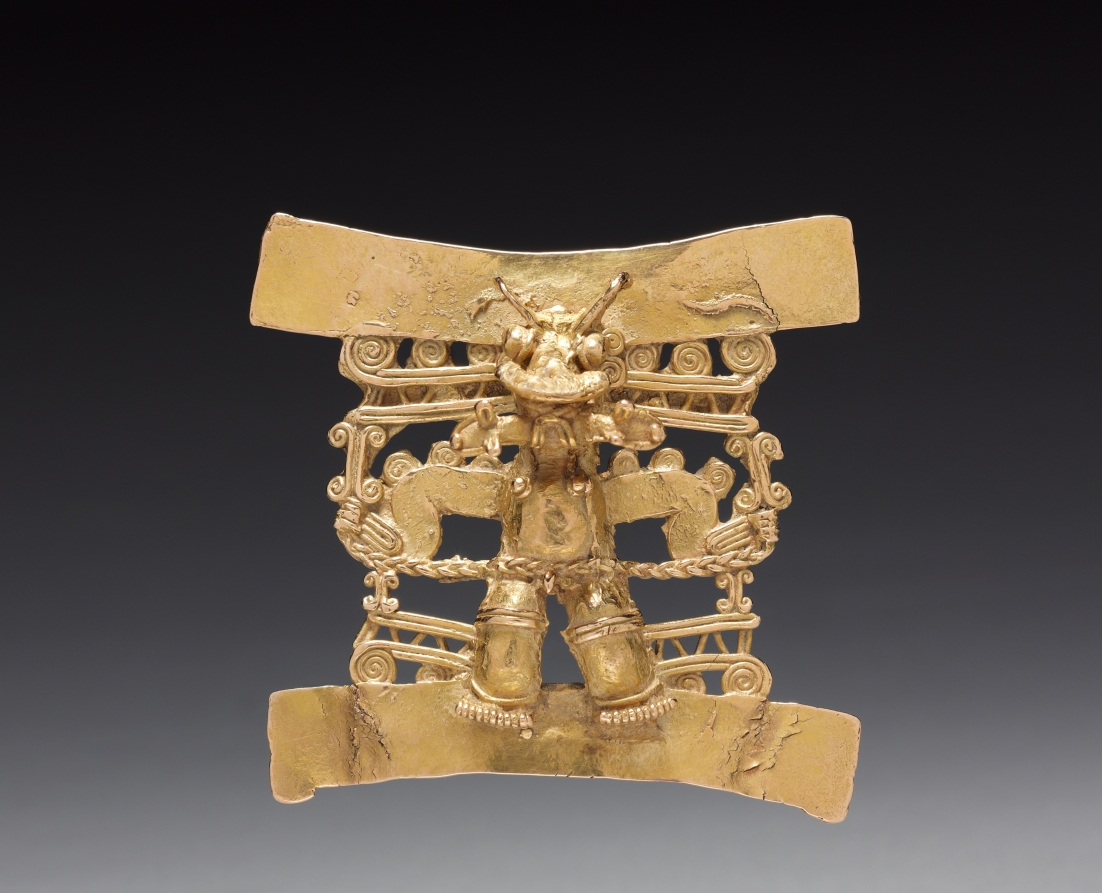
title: Animal-Headed Figure Pendant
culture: Costa Rica, Diquís region, 11th-16th century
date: c. 1000–1550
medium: cast gold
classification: Metalwork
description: Among the pendants shown here are a crustacean (1943.290), an animal-headed figure (1948.18), and two pendants featuring birds (1951.442 and 1946.223). The latter were dubbed aguilas (eagles) by Christopher Columbus, who saw natives wearing them as necklace ornaments. Modern researchers are not as sure of the species shown, but some believe that they are birds of prey because talons and beaks are prominent and often clutch something, in one example here a small, disembodied head that holds a clapper. In both examples, two tufts in the form of crocodiles in profile flank the birds’ heads.